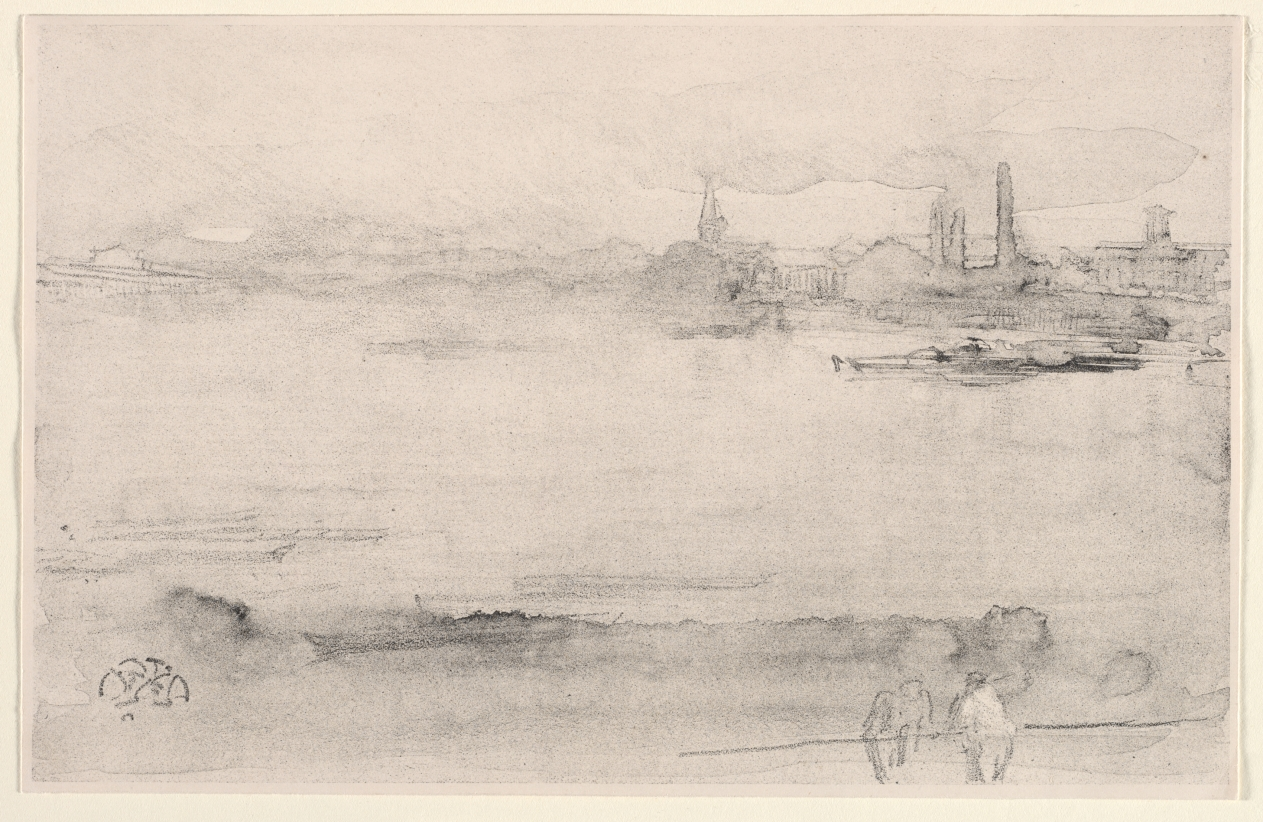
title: Early Morning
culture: America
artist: James McNeill Whistler (American, 1834–1903)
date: 1898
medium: lithograph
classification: Print